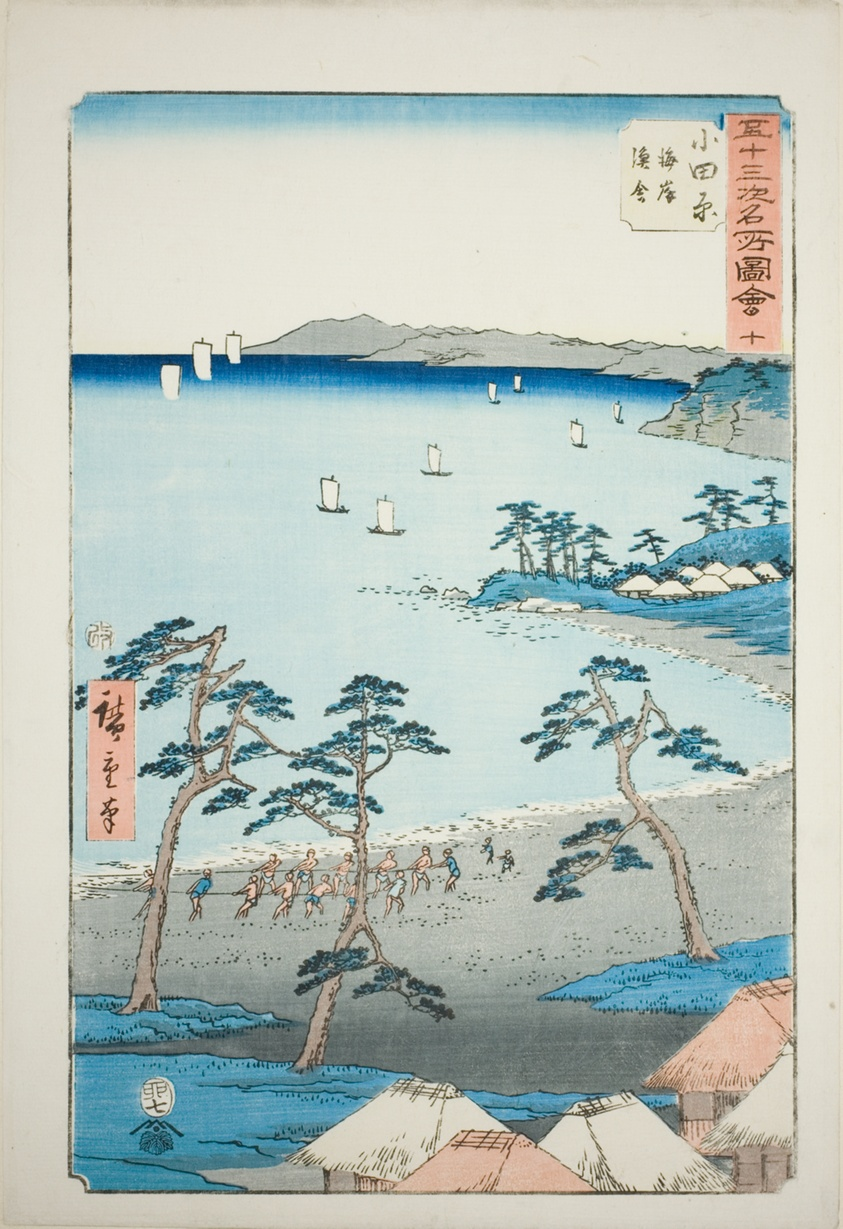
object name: Print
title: Odawara: Fishermen's Houses on the Beach (Odawara, kaigan gyosha), no. 10 from the series "Famous Sights of the Fifty-three Stations (Gojusan tsugi meisho zue)," also known as the Vertical Tokaido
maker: Utagawa Hiroshige 歌川 広重; Japanese, 1797-1858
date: 1855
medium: Color woodblock print; oban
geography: Japan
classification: woodblock print; print; asian art